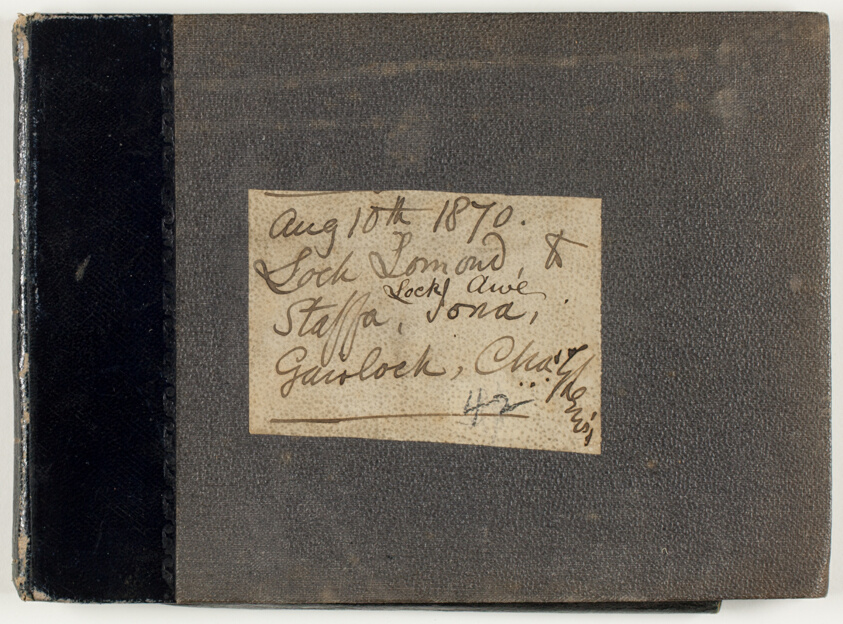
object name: Book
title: Loch Lomond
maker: Charles George Lewis (English, 1808-1880)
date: 1870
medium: Sketchbook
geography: England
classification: sketchbook; graphite; prints and drawing; book